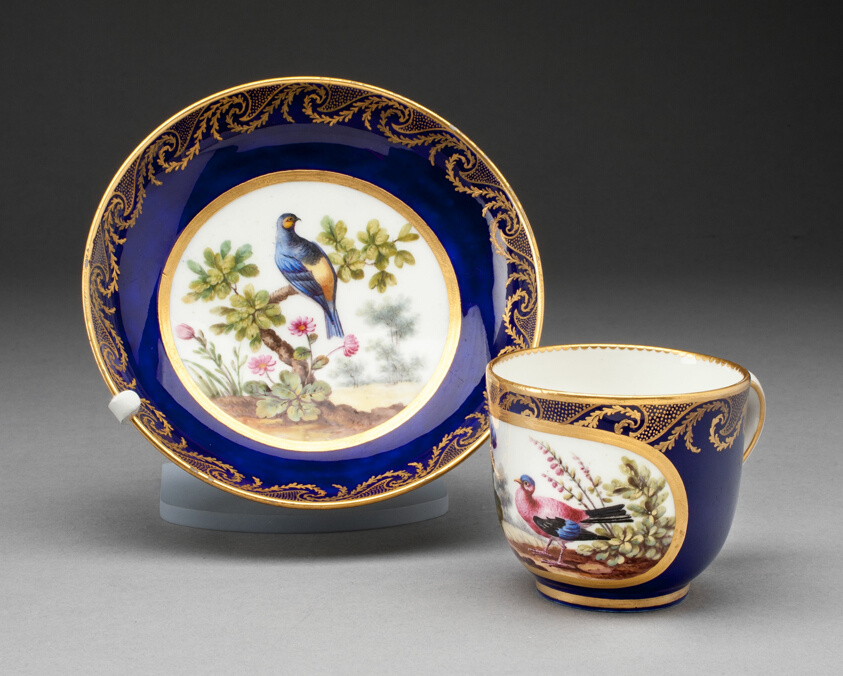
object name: Ceramics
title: Cup and Saucer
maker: Sèvres Porcelain Manufactory; French, founded 1740; Painted by Françoise Joseph Aloncle (French, fl. c. 1758-1781)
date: 1772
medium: Soft-paste porcelain, dark blue ground, polychrome enamels, and gilding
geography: Sèvres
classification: drinking vessel; teaware; ceramics; porcelain; european decorative arts